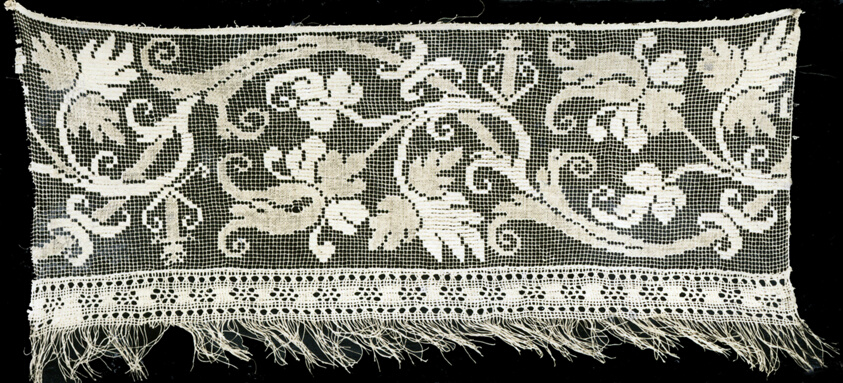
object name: Textile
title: Border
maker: Italy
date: 19th century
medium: Linen, knotted thread ground known as "filet" with darned in patterning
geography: Italy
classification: textile; needlework - lace; needlework (visual works)